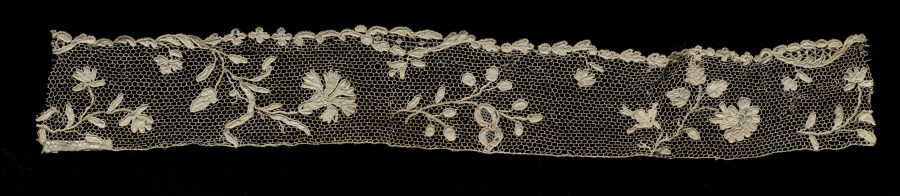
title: Lace Edging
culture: France, Argentan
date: 1715–74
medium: Linen: needle lace (Argentan)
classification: Lace